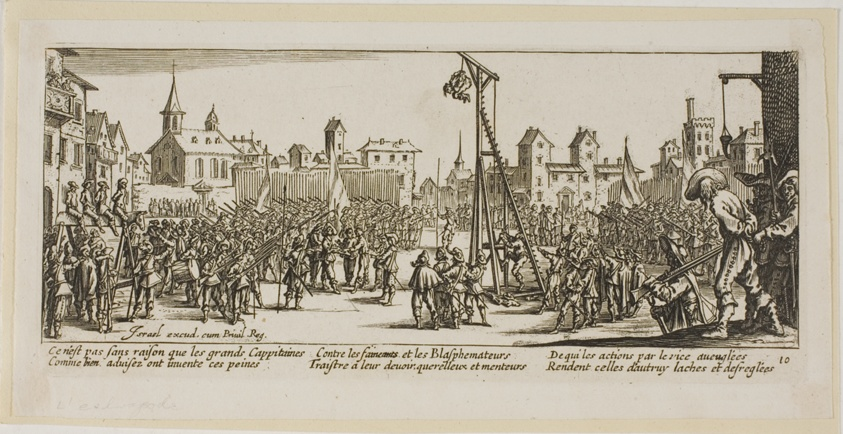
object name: Print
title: The Strappado, plate ten from The Large Miseries of War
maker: Gerrit Lucasz van Schagen (Dutch, born 1642); after Jacques Callot (French, 1592-1635)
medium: Etching on paper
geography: Netherlands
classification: etching; print; prints and drawing